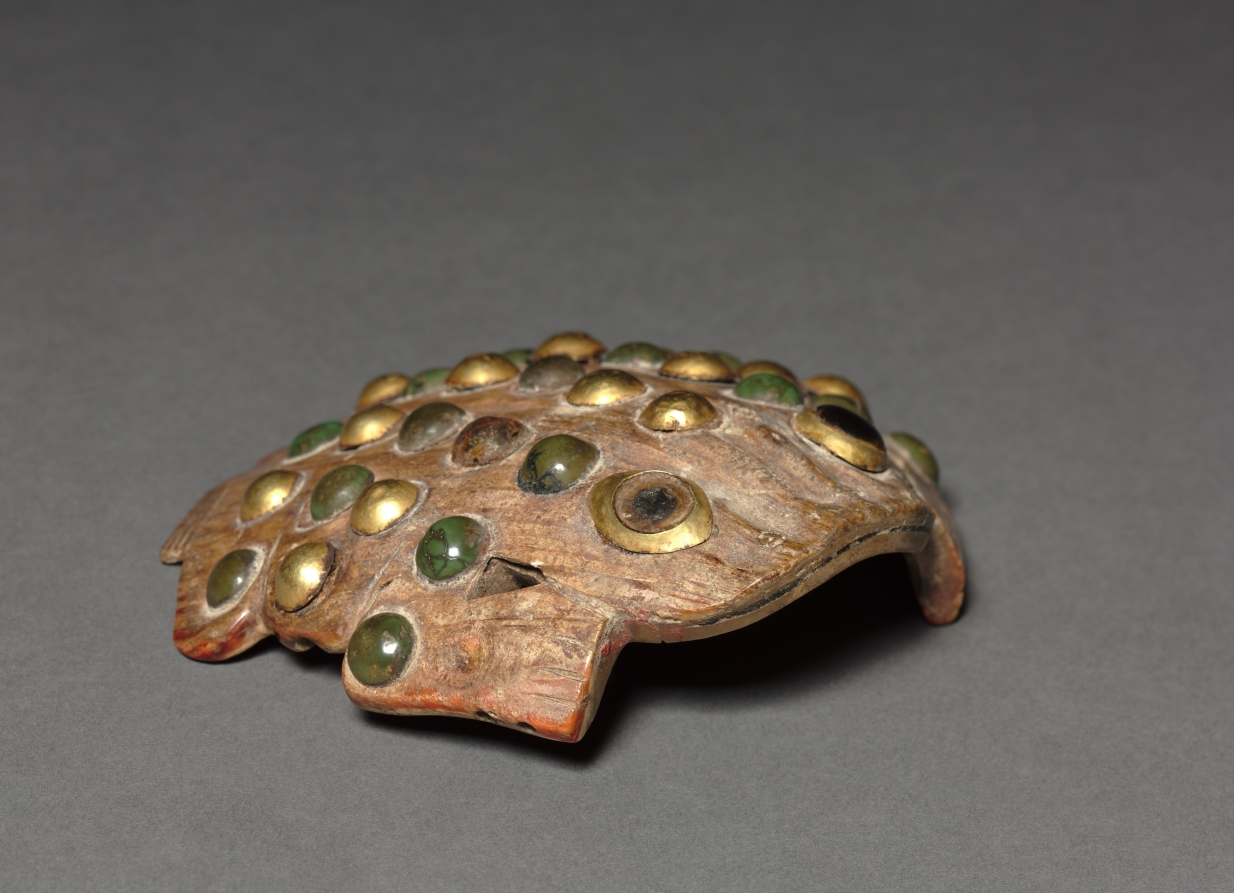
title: Frog Ornament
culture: Peru, Moche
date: 50–800 CE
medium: shell, stone, gold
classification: Jewelry